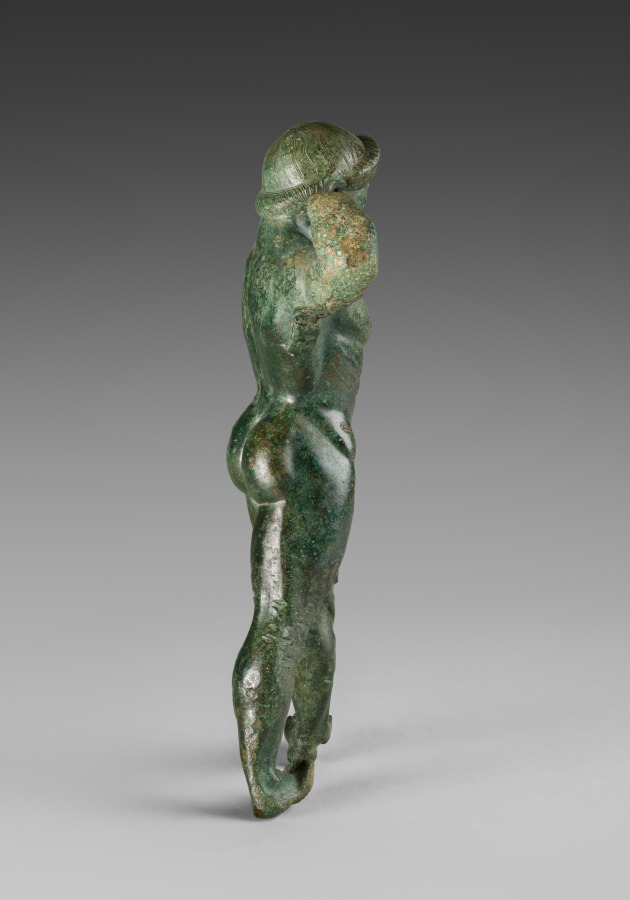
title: Statuette of Herakles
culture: Greek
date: 510–500 BCE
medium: bronze (solid cast)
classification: Sculpture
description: Striding forward with his left foot, this nude figure turns his torso and raises his tightly bent right arm behind his head. Despite significant damage, the statuette conveys a naturalistic sense of form and movement rarely seen in early Greek art. Its most striking feature is its powerful physique, with sharply defined, bulging muscles. Formerly called an athlete and assumed to have held a javelin or discus, the figure likely depicts the hero Herakles, revered for his strength and often shown in this smiting pose, wielding a club. Though usually bearded in this period, this representation emphasizes his youthfulness, with an idealized face and carefully arranged hair.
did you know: This robust figure exudes power, despite his damaged feet and missing hands.